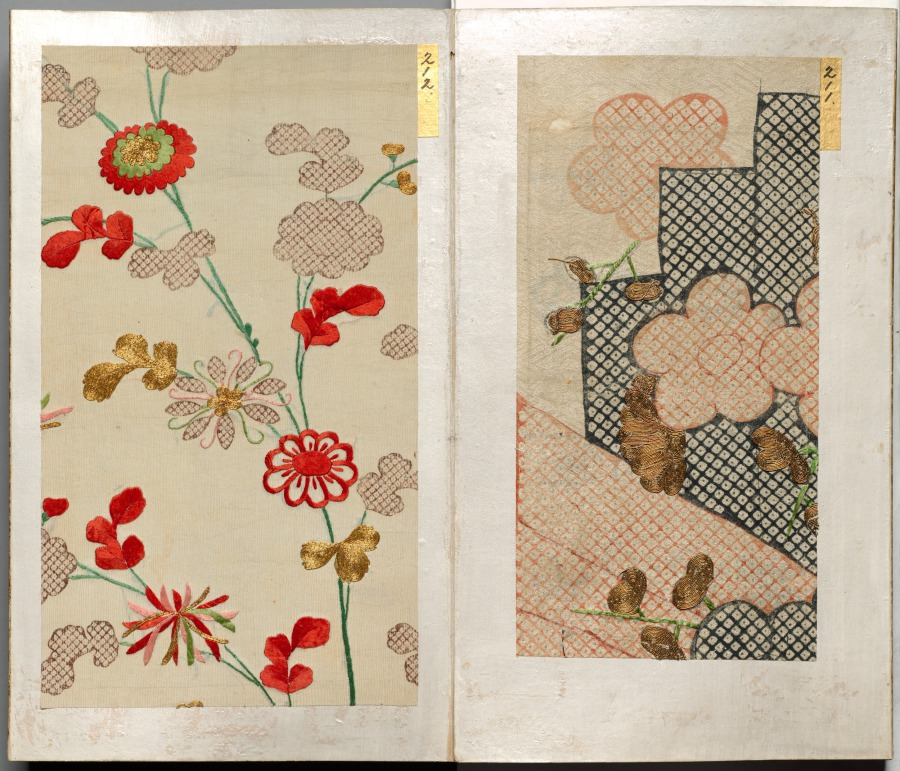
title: Album of Textile Samples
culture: Japan, Edo period (1615–1868)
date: 1600s-1700s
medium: silk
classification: Textile